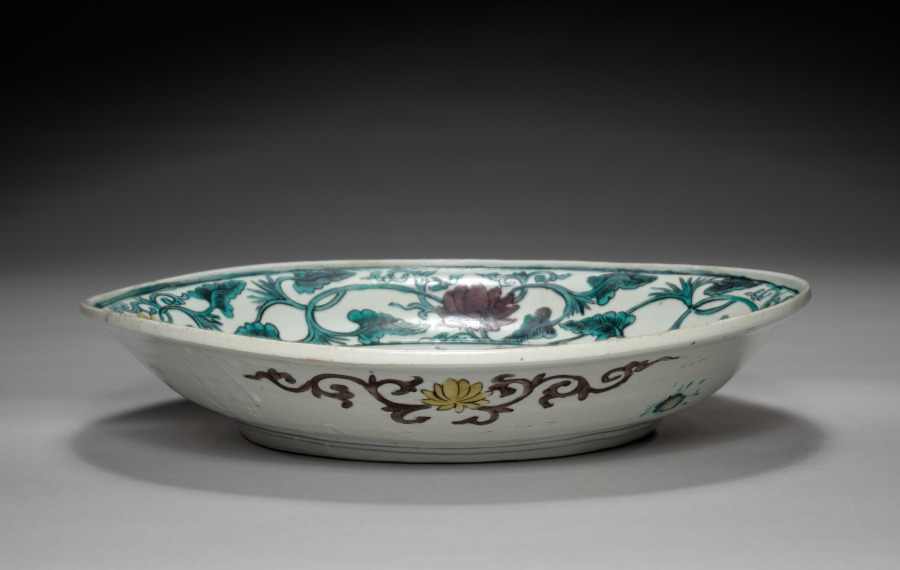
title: Plate with Bird and Flower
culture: Japan, Edo period (1615–1868)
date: mid- to late 1600s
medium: Porcelain with overglaze enamel (Hizen ware, Ko-Kutani style)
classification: Ceramic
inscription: "FUKU" in square seal under aubergine glaze.